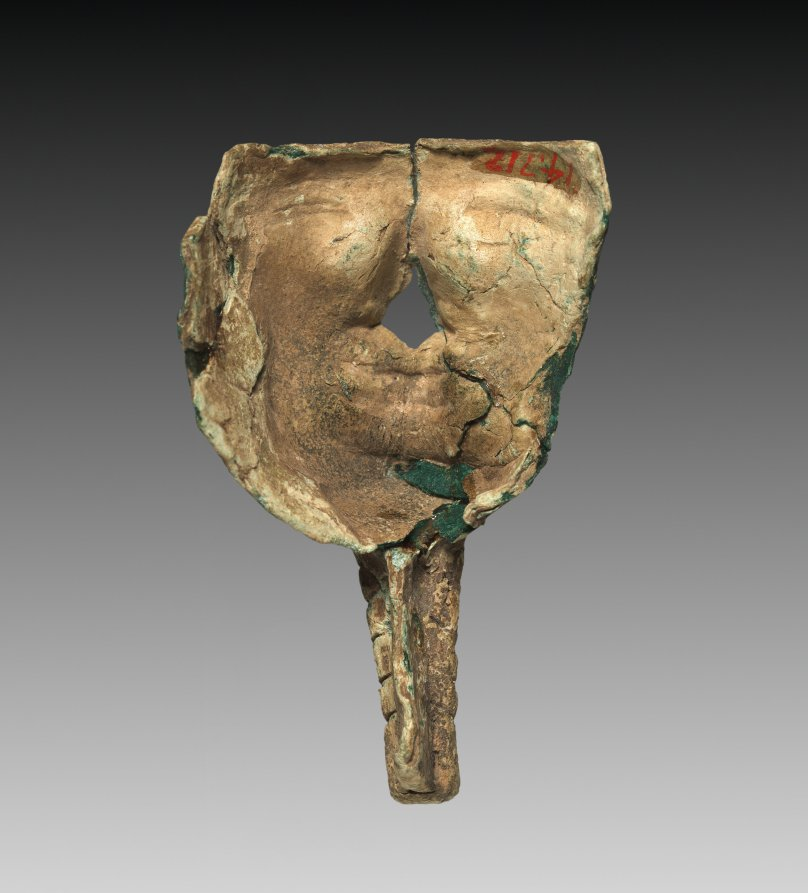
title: Mask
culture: Egypt, probably Greco-Roman period (332 BCE–395 CE)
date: 332 BCE–395 CE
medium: wax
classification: Funerary Equipment